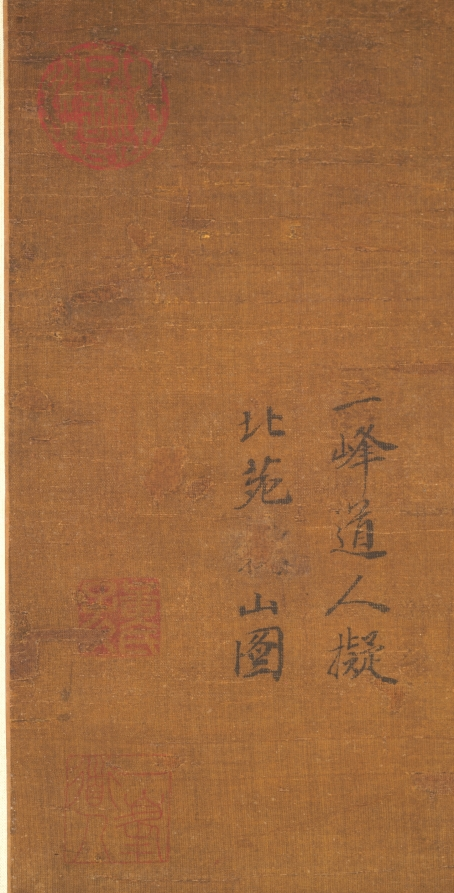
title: Summer Mountains (after Dong Yuan [active c. 937–75])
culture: China, Yuan dynasty (1271-1368)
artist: attributed to Huang Gongwang (Chinese, 1269–1354)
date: 1290–1354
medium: hanging scroll; ink and slight color on silk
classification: Painting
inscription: 【印】一峰道人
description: This monumental landscape is drawn in softly rounded strokes with darker lines frequently applied on top of lighter ones. This technique recalls one of the suggestions included in a collection of the artist's writings known as Secrets of Landscape Painting: The most difficult thing in painting is using the ink. The artist begins by using dilute ink and builds it up to the point where it begins to look right, then uses dense, black ink, applied fairly dry, and washes of deeper-toned ink. This technique distinguishes the fields from the paths, the far from the near. Huang Gongwang may have learned this technique from observing nature through the eyes of an earlier master, Dong Yuan, a painter whose style he shared.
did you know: The wet hills and moist, rich atmosphere evoke the southern Chinese summer, characterized by monsoon rains and lush growth.